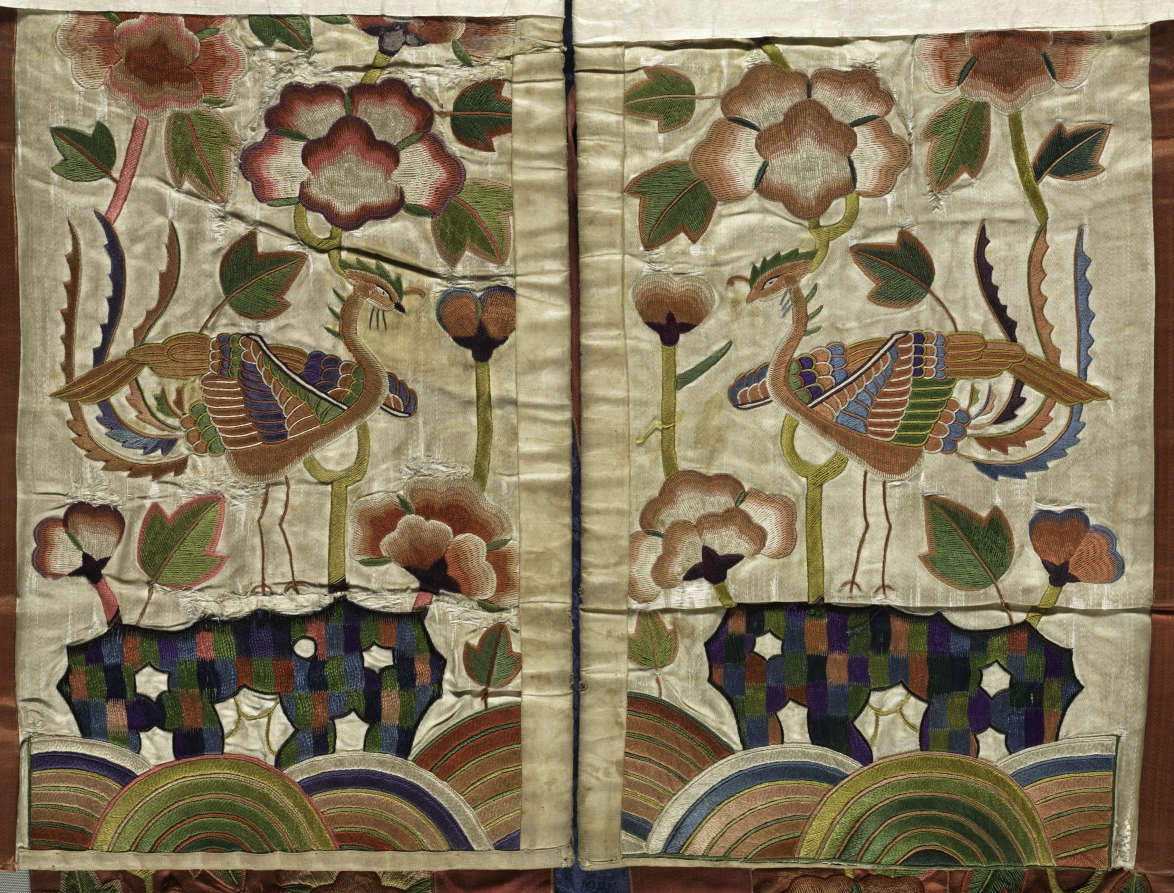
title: Bridal Robe (Hwarot)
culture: Korea, Joseon dynasty (1392–1910)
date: late 1800s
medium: Silk: satin weave; embroidery; paper edging on neck and sleeves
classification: Garment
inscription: 壽如河海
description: This bride's robe is exquisitely embroidered with various symbols of happiness in colorful silk threads. Butterflies stand for marital happiness; the phoenix, numerous offspring; and lotus flowers and white cranes, longevity. Yet, the bridal robe does not attest to the life of luxury. To the contrary, many traces of repairs, trimmings, and patchwork, reflect Joseon period women’s commitment to value neo-Confucian aesthetics of frugality and modesty. Substantial repairs and patching reveal that this robe served as an important communal resource to be shared and passed down through several generations. Its collar and sleeves are covered in thick white paper; this paper is replaced with new paper for each bride, while the robe itself was reused for decades.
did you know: This bride's robe is made of densely embroidered silk, but its collar and sleeves are covered in thick paper.